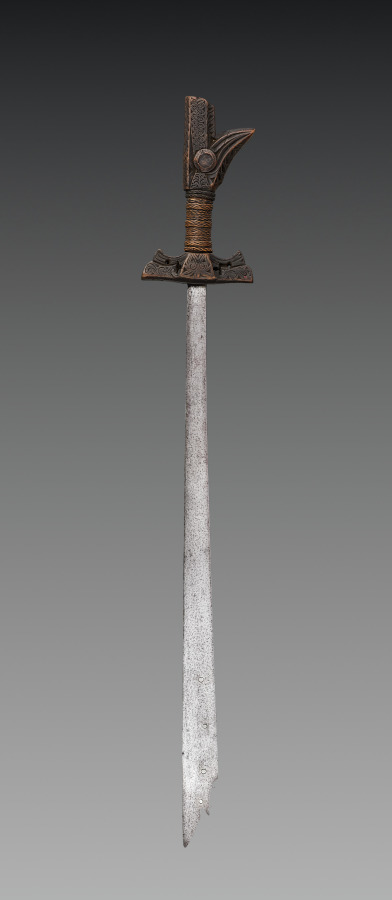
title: Sword (Kampilan)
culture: Philippines, Mindanao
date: before 1916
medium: Blade: forged steel; handle: wood with braided cane cord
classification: Arms and Armor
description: This sword features a long, straight, single-edged steel blade that widens near the tip. The hilt is carved from dark hardwood and takes the shape of a stylized zoomorphic figure, possibly a bird, buwaya (crocodile), or naga. The materials, carving style, and blade form correspond to kampilan-type swords made among the Maranao and Maguindanao people of northern and central Mindanao.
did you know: The kampilan was both a functional weapon and a symbol of warrior status.